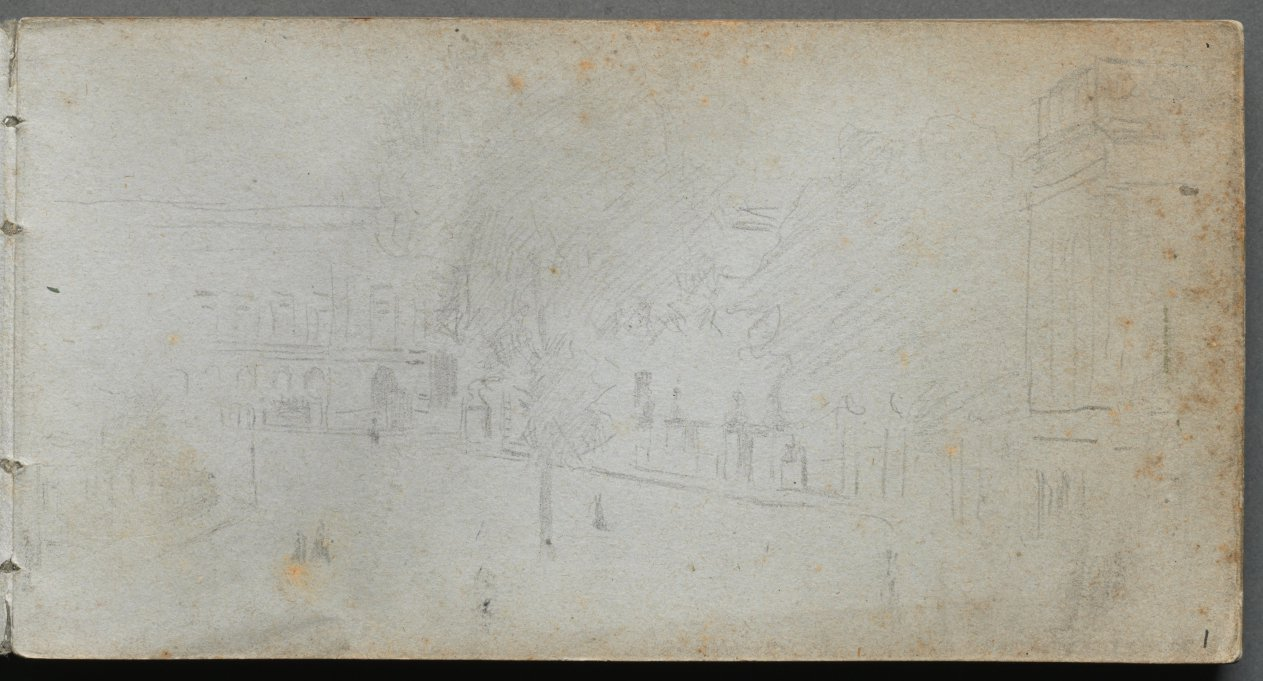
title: Sketchbook, page 1: Street Scene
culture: France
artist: Ernest Meissonier (French, 1815–1891)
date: c. 1860s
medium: graphite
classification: Bound Volume